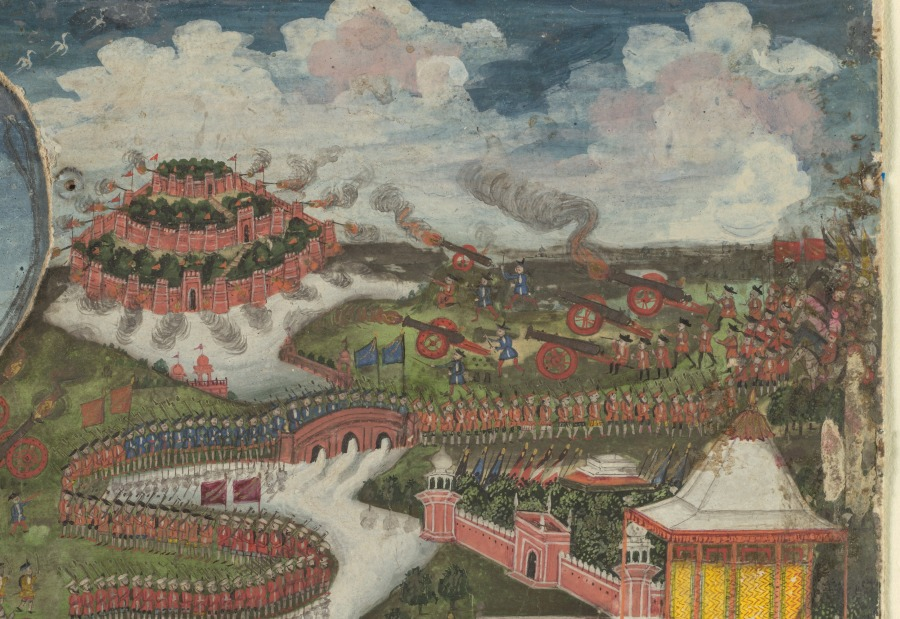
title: Women bathing before an architectural panorama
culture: India, Lucknow, Mughal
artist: Fayzullah (Indian, active c. 1730–1765)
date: c. 1765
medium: Gum tempera and gold on paper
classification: Painting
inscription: Persian inscription in center, on marble balustrade, in nasta‘liq script: The work of Fayzullah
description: Despite the wars waged and forts besieged in the background, life in the palace is carefree and luxurious. Some women enjoy hookahs and music on balconies, while others swim and drink liquor with abandon from Chinese porcelain cups and bottles. The artist has placed his name under the central pavilion, observing the scene across a formal garden of marigolds. The artist seems to have enjoyed experimenting with the idea of perspective, learned from European sources. He created a rapidly receding space that telescopes the view from the intimate harem quarters to the distant battlefields.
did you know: The artist signed his name below the king’s seat that overlooks the garden vista.